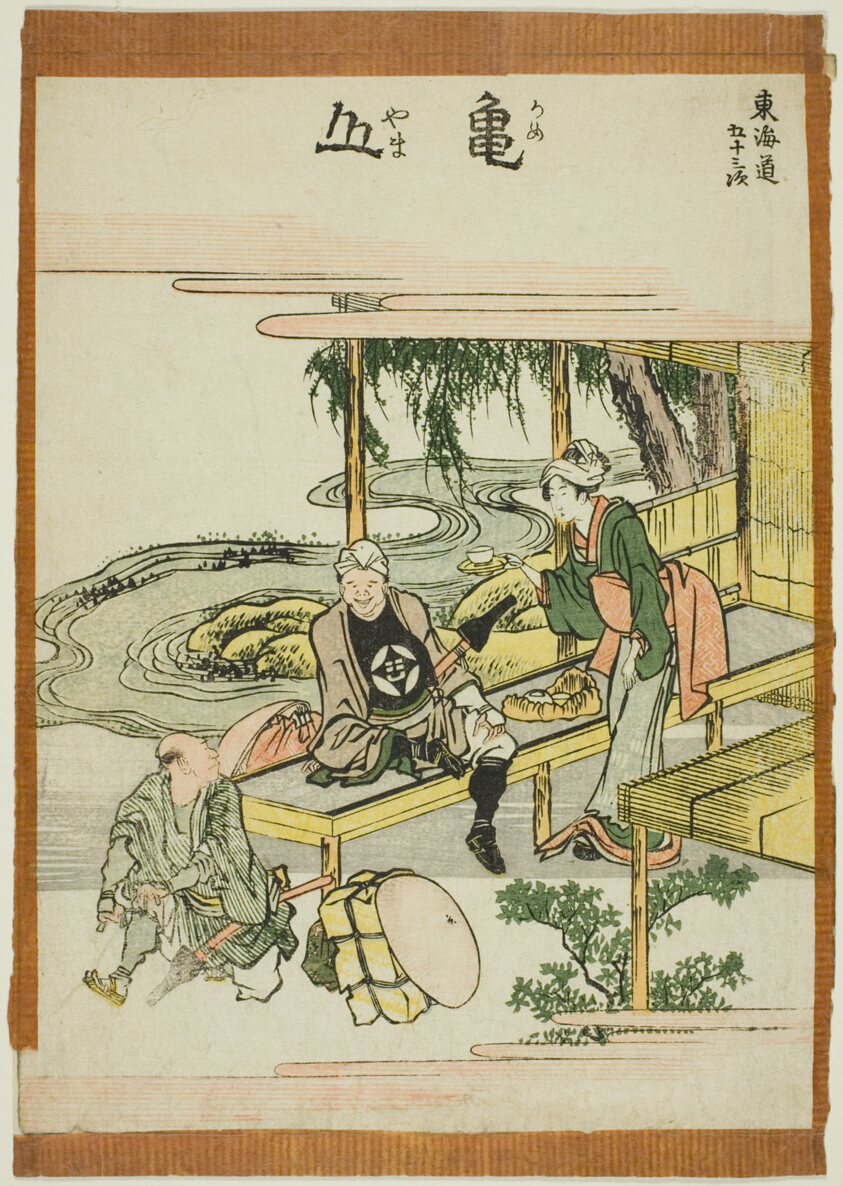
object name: Print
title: Kameyama, from the series "Fifty-three Stations of the Tokaido (Tokaido gojusan tsugi)"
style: Japanese (culture or style)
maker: Katsushika Hokusai 葛飾 北斎; Japanese, 1760-1849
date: c. 1806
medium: Color woodblock print; chuban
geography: Japan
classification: woodblock print; print; asian art